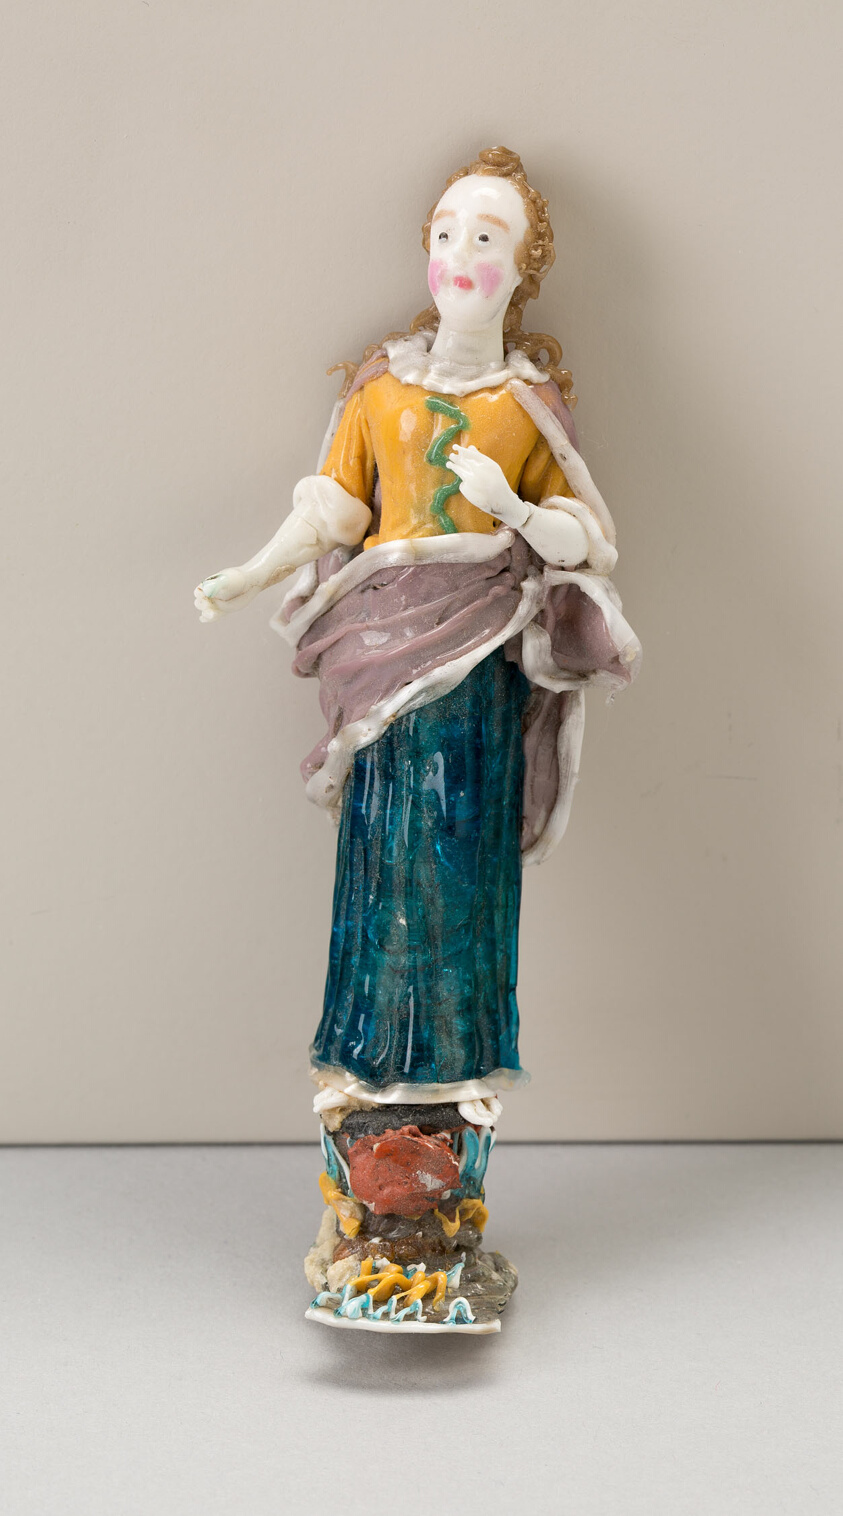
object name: Glass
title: Girl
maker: Nevers, France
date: Late 17th to early 18th century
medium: Glass; lampwork (verre de Nevers), metal armature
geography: France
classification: glass; miniature; decorative object/ornament; european decorative arts